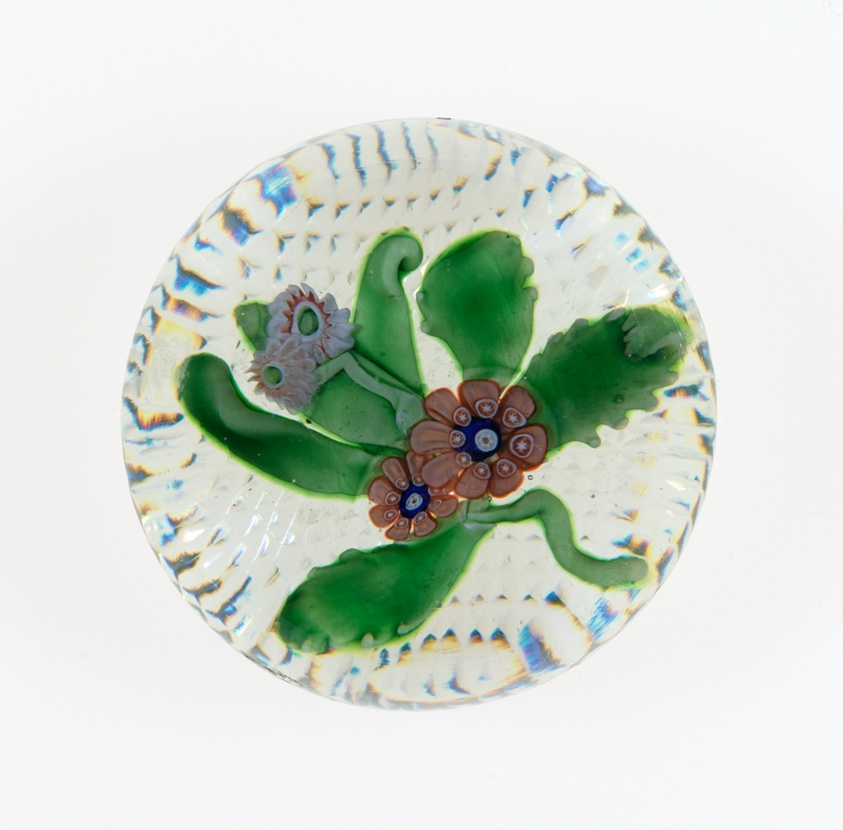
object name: Glass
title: Paperweight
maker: Saint-Louis Glassworks (Cristalleries de Saint-Louis); Lorraine, France, founded 1586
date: c. 1845–60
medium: Glass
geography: Saint-Louis-lès-Bitche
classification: paperweight; glass